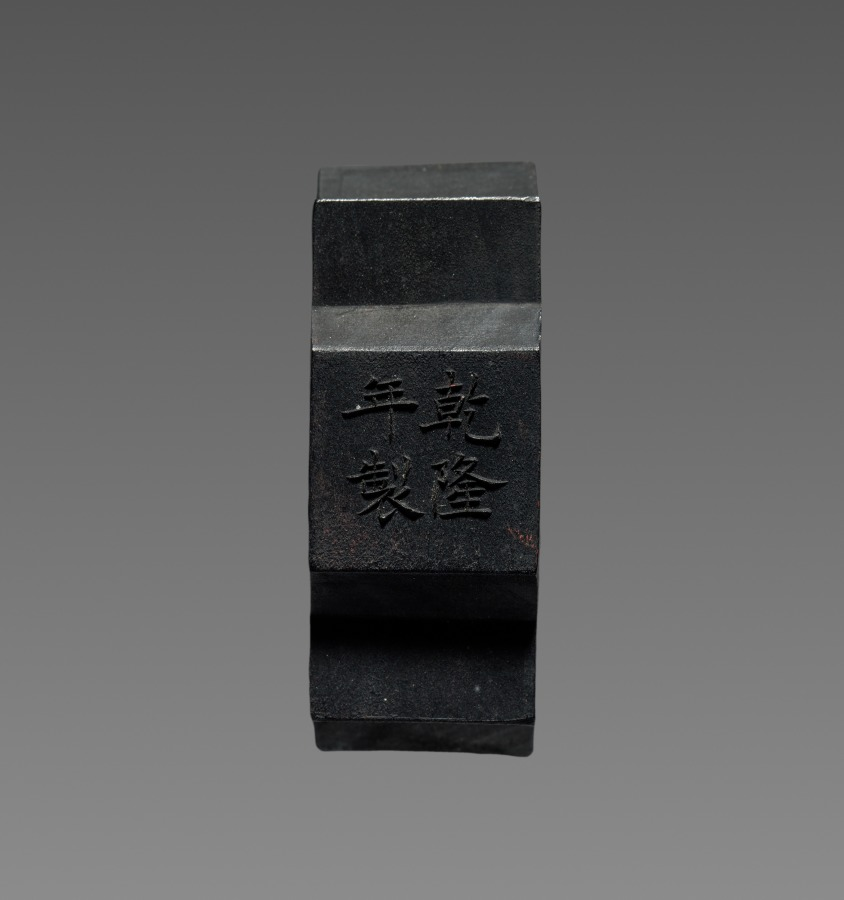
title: Ink Stick from an Imperially Commissioned Set of Ink Stick with Images and Poems of Famous West Lake Sites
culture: China, Qing dynasty (1644–1911), Qianlong reign (1736–95)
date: 1780–94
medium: Molded ink in black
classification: Miscellaneous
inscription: 御製南屏晚鍾庚子。 幾暇搜冥對硯屏， 霜鐘送響一聲聲， 鬢霜已改十年貌， 醒耳清音卒未更。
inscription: 乾隆年製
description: This is one of ten ink cakes of different shapes and colors stored in an exquisite lacquer box. Each is inscribed in gold with a poem by the Qianlong emperor, praising the ten famous sights of the Westlake in Hangzhou, near Shanghai. The Westlake is famous for its natural beauty; it was a favorite imperial destination and remains a tourist attraction today. Ink cakes (also called ink sticks) are dissolved with the addition of water and ground on the surface of a flat stone into liquid ink for painting and calligraphy. The precious ink cakes here, however, have never been used.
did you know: The design is Jingci Temple, a Buddhist temple beside West Lake in Hangzhou, China.